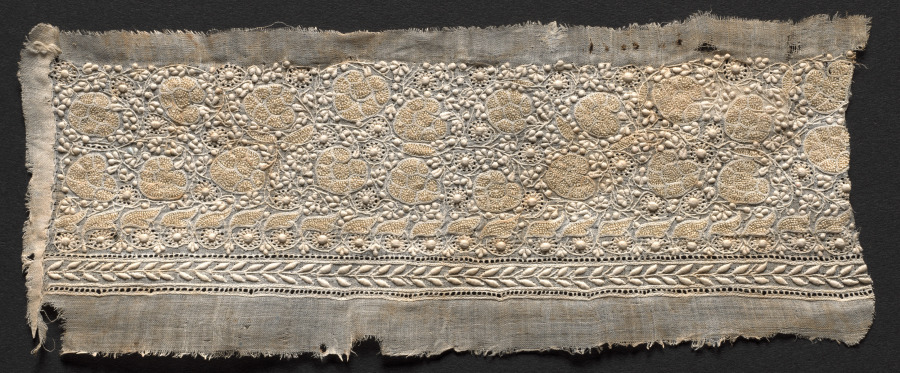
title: Fragment of a Cap Band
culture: India, Lucknow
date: 1880–99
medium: Plain weave cotton: embroidered ("chikan" type)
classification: Embroidery